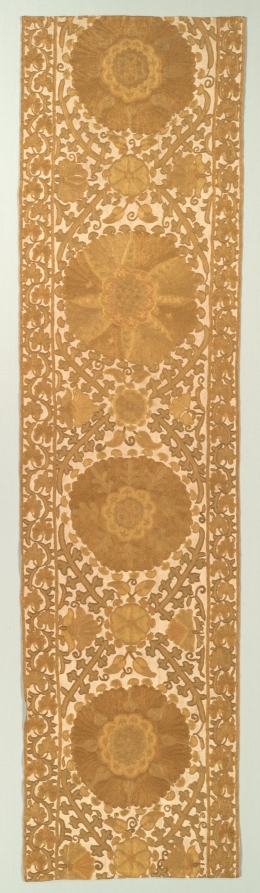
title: Panel, Probably from a Curtain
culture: Uzbekistan, Bukhara, 19th century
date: 19th century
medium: embroidery: silk on cotton tabby ground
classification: Embroidery